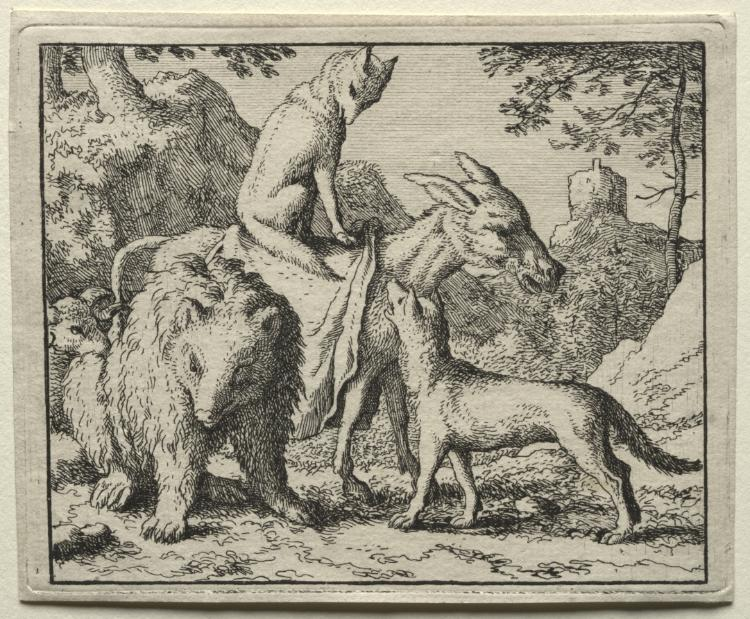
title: Reynard the Fox: Reynard and his Companions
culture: Netherlands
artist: Allart van Everdingen (Dutch, 1621–1675)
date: 1650–75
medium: etching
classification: Print